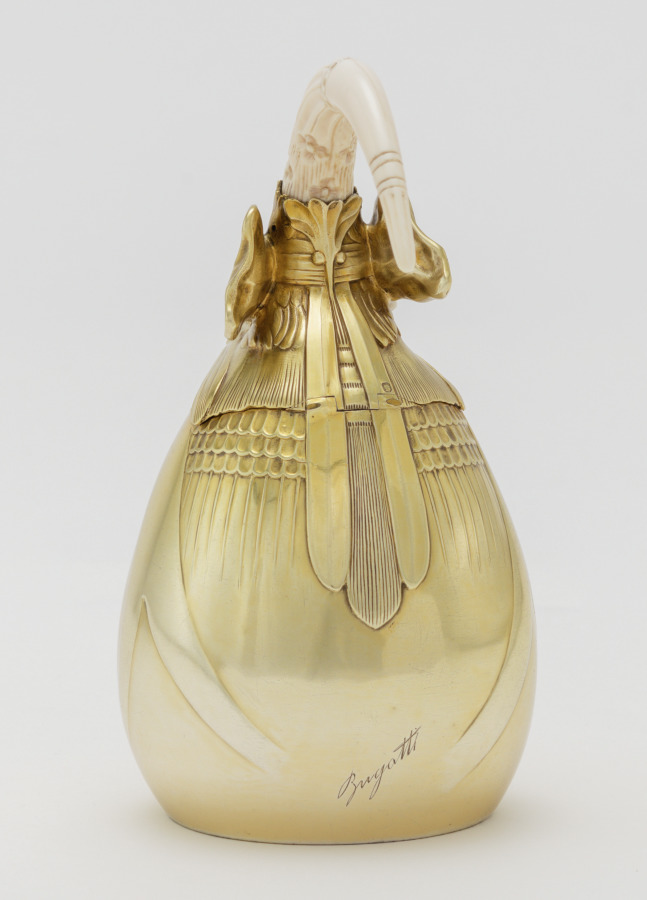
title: Tea Pot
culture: France, Paris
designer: Carlo Bugatti (Italian, 1856–1940)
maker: Adrien-Aurélien Hebrard (French, 1866–1937)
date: c. 1907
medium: Gilt silver and ivory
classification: Silver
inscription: Made by A. A. Hebrard Firm, Paris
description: This tea and coffee service, salver, and table, together with some now missing cups, were all designed by Carlo Bugatti as an ensemble and presented at the 1902 exposition devoted to decorative arts in Turin, Italy. The set was probably acquired from Bugatti's 1907 exhibition at the Galerie Hébrard in Paris by a wealthy South African widow, Anna Blake, who was living there at the time. Some of the animal and insect motifs suggest mythical beasts or the fossils of prehistoric animals. When Mrs. Blake returned to Cape Town, she took these and other pieces designed by Bugatti with her, and they remained in South Africa throughout her lifetime.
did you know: This tea pot is part of a tea and coffee service designed by Carlo Bugatti.